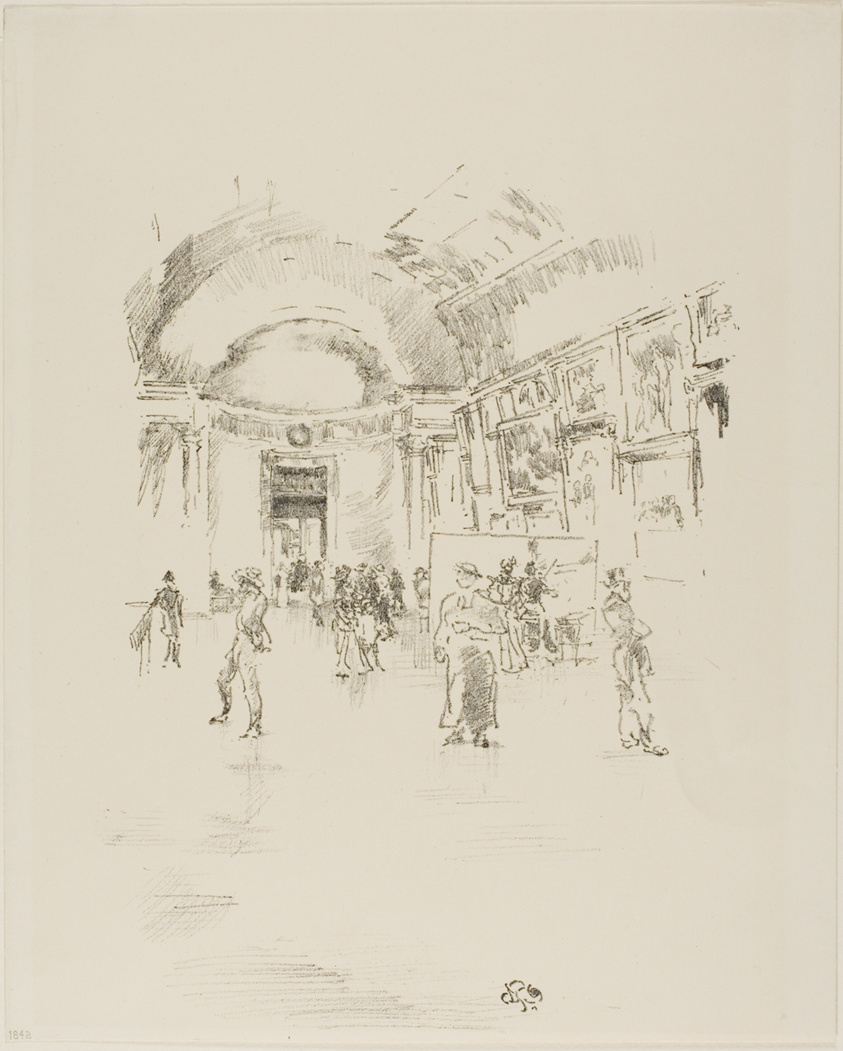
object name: Print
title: The Long Gallery, Louvre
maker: James McNeill Whistler (American, 1834-1903)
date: 1894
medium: Transfer lithograph in black with stumping, on cream wove paper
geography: United States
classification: transfer lithograph; lithograph; print; prints and drawing; paper